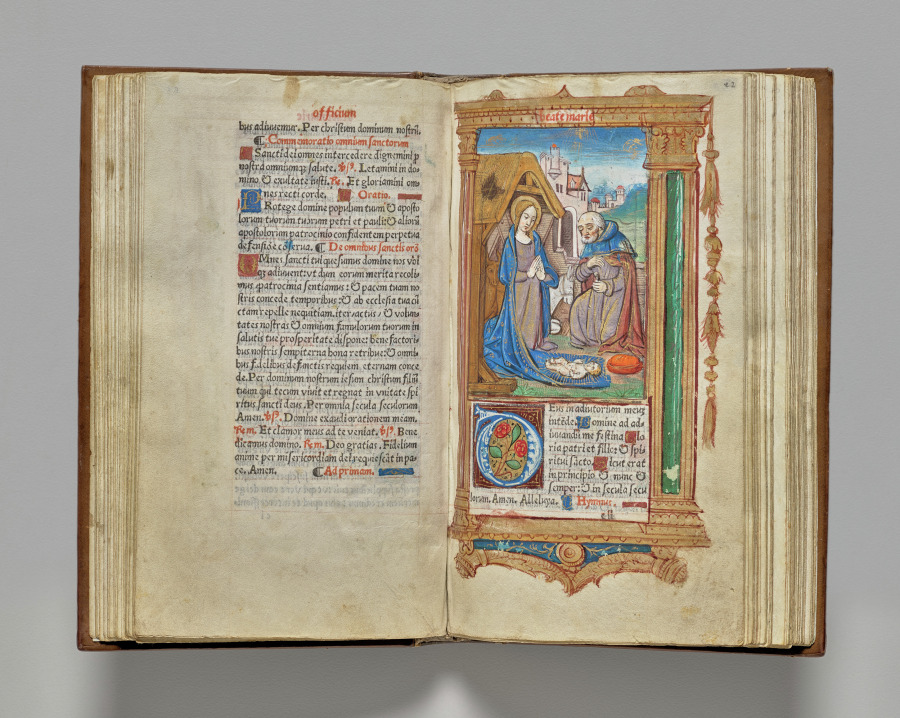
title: Printed Book of Hours (Use of Rome): fol. 34r, The Nativity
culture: France, Paris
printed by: Guillaume Le Rouge (French, Paris, active 1493–1517)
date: 1510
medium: 112 Printed folios on parchment, bound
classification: Bound Volume